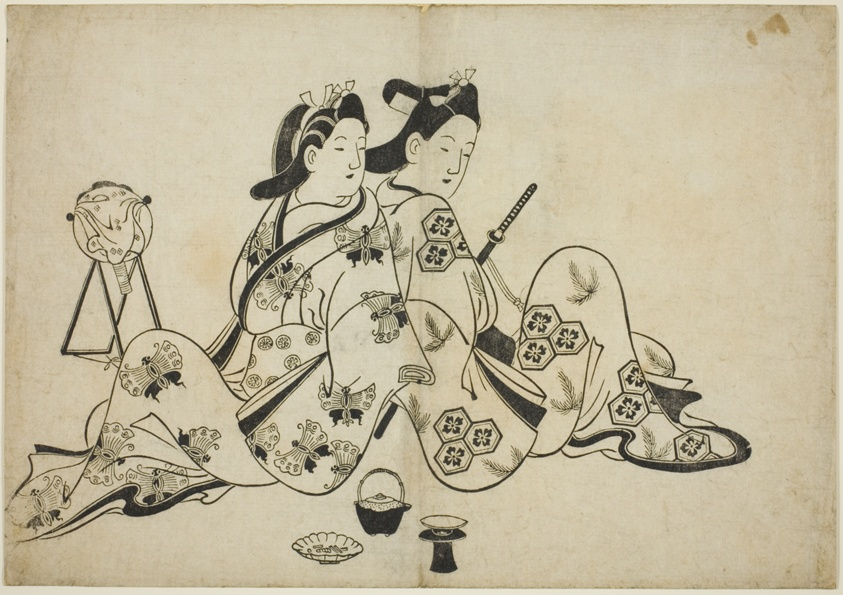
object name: Print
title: Back to back, from a series of 12 prints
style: Japanese (culture or style)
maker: Attributed to Furuyama Moroshige; Japanese, active c. 1684-1704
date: c. 1700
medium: Woodblock print; oban, sumizuri-e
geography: Japan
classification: woodblock print; print; asian art; woodblock